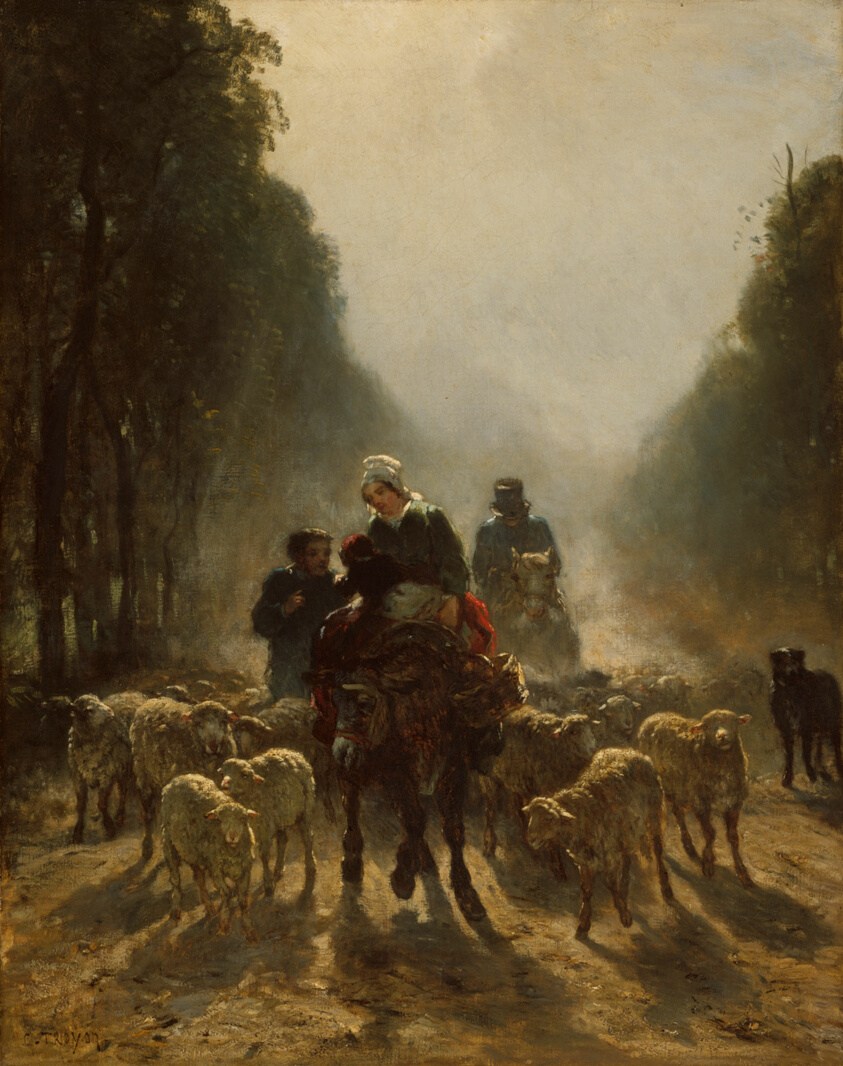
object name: Painting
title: The Road to Market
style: nineteenth century, 19th century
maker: Constant Troyon (French, 1810–1865)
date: 1858/59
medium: Oil on canvas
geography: France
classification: painting; paint; oil paintings (visual works); oil on canvas; french; european painting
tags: livestock, sheep, animals, horse, paths, road, trees, nature, dog, dogs, men, women, woman, shepherds, sky